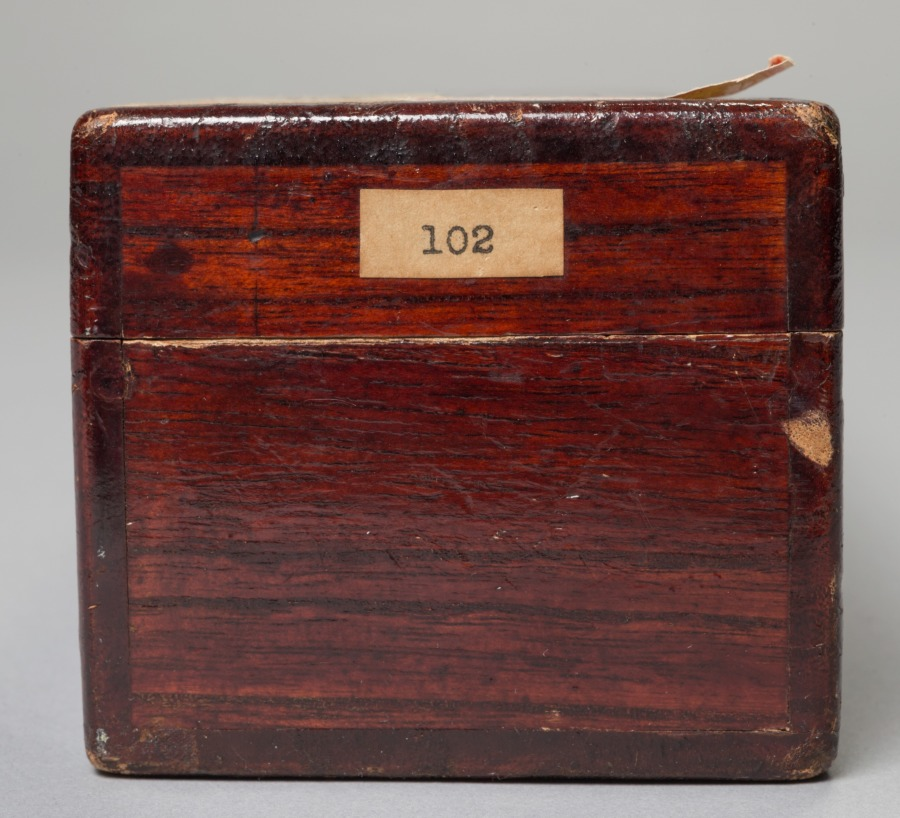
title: Wild Geese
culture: Japan, Muromachi period (1392–1573)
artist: Chōkichi (Japanese)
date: early 1500s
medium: hanging scroll; ink on paper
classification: Painting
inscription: Gourd-shaped seal of Chokichi at lower left